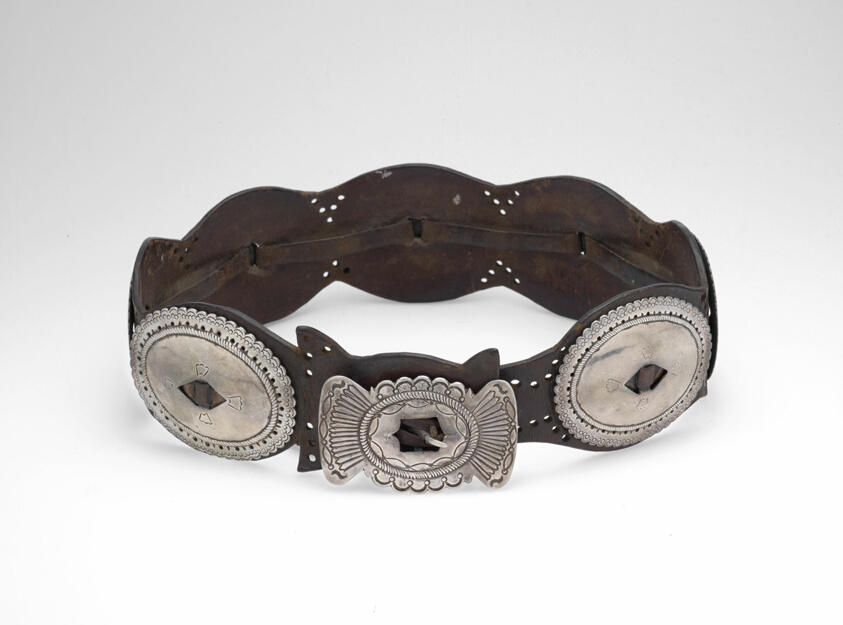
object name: Costume and Accessories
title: Concho Belt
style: navajo, dine, americas, native american, native north american, Arts of the Americas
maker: Navajo (Diné) (Northern New Mexico or Arizona, United States)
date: 1880–95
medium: Silver and leather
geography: Arizona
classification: belts (costume accessory); art of the americas; costume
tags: jewelry, geometric, silver (color), status